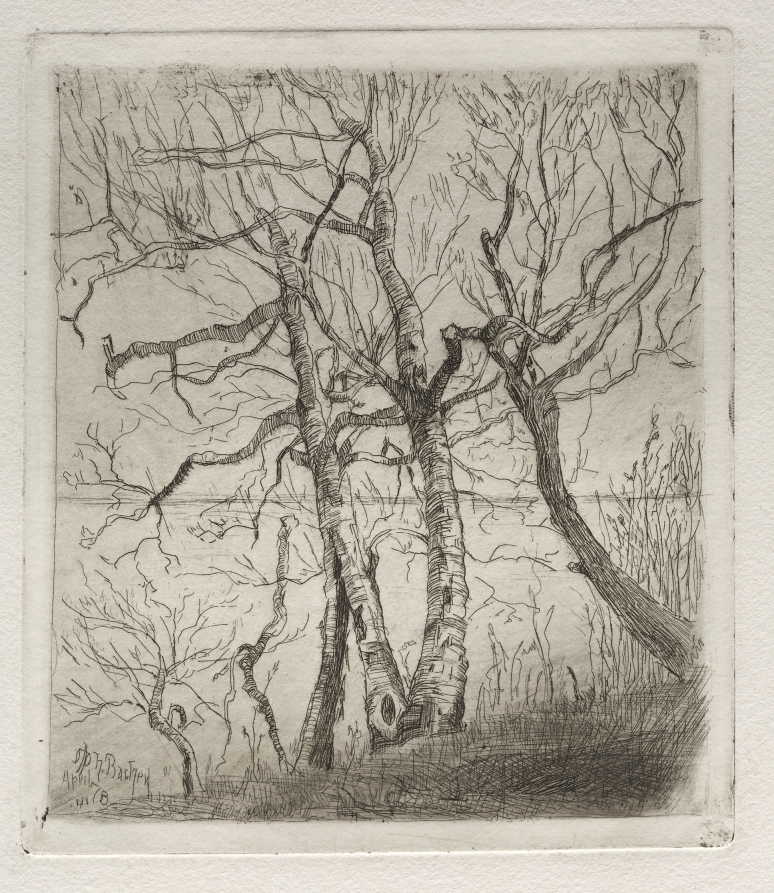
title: Woods by the Lake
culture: America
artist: Otto H. Bacher (American, 1856–1909)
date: 1878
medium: etching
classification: Print